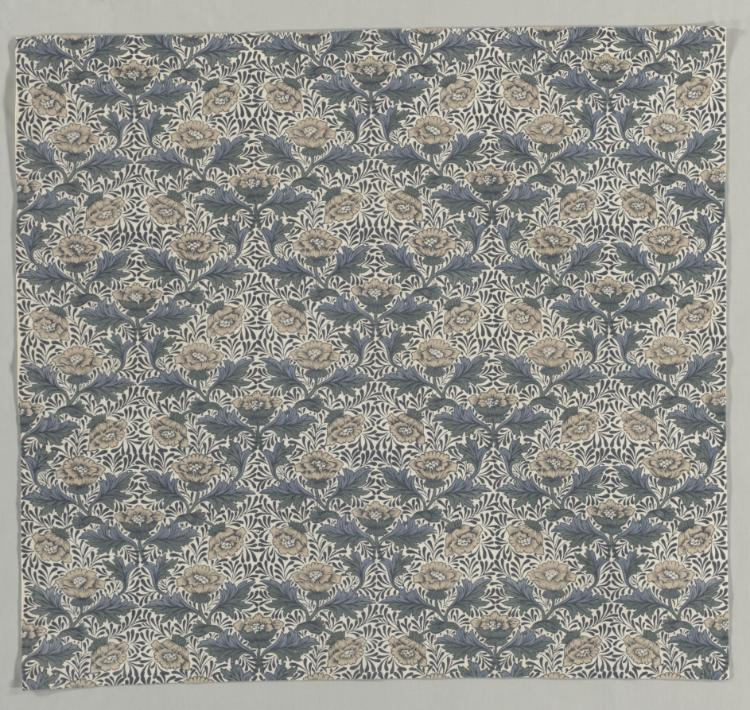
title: Peony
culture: England, 20th century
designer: Kate Faulkner (British, 1841–1898)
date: 1920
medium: plain weave cotton, printed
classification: Textile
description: Peony was probably designed for Morris & Co. by Kate Faulkner, the sister of William Morris’s early business partner Charles Faulkner. The small, almost square repeat of this pattern is more characteristic of Kate than of Morris, who favored larger patterns. She also designed embroidery, wallpaper, painted tiles and pottery, and plaster decoration for the firm. Morris had a progressive attitude toward women as co-laborers, and promoted the work of designers such as Kate, whose patterns challenged the monotony of much of the needlework and domestic crafts that then occupied middle-class women.